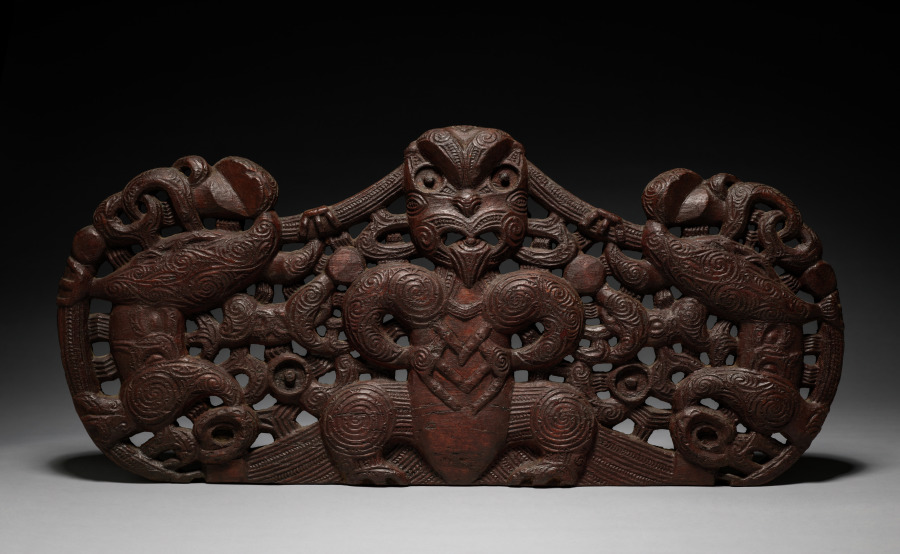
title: Door Lintel (Pare)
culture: Pacific Islands, Polynesia, New Zealand, Māori people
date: 1800s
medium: wood, pigment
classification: Sculpture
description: In the past, a lintel (pare) was placed over the entryway of Māori meeting houses, which are sacred structures. Thus, the visitor passed under the lintel’s central deity figure, often a female but here of unclear sex. To either side is an animal-like guardian spirit (manaia) shown in profile and facing outward; look for the feet grasping the lintel’s borders.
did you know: Two guardian spirits (manaia) flank the central deity figure of this lintel (pare).